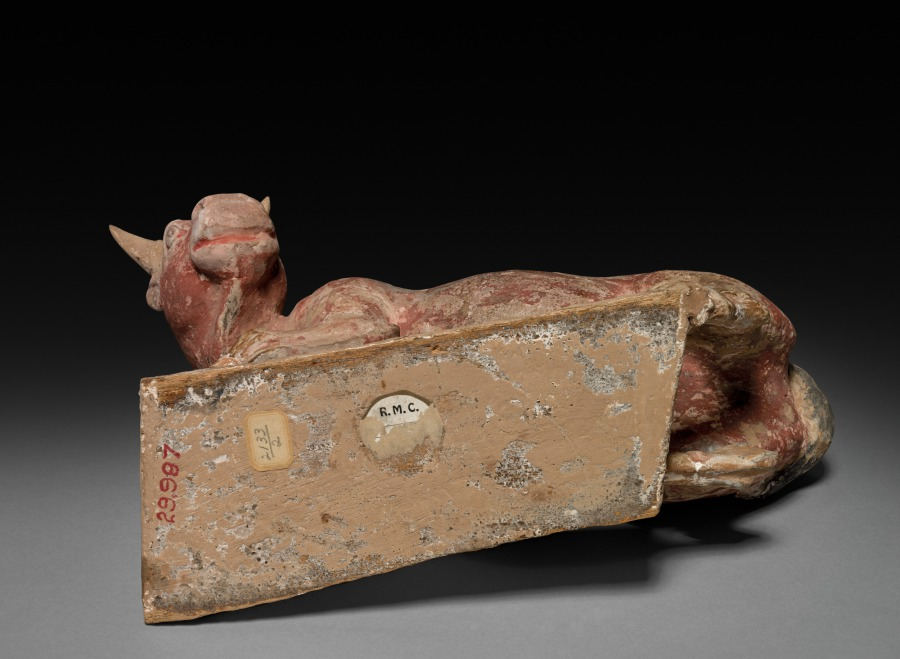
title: Bull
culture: China, Tang dynasty (618–907)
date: 618–907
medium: painted earthenware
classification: Ceramic